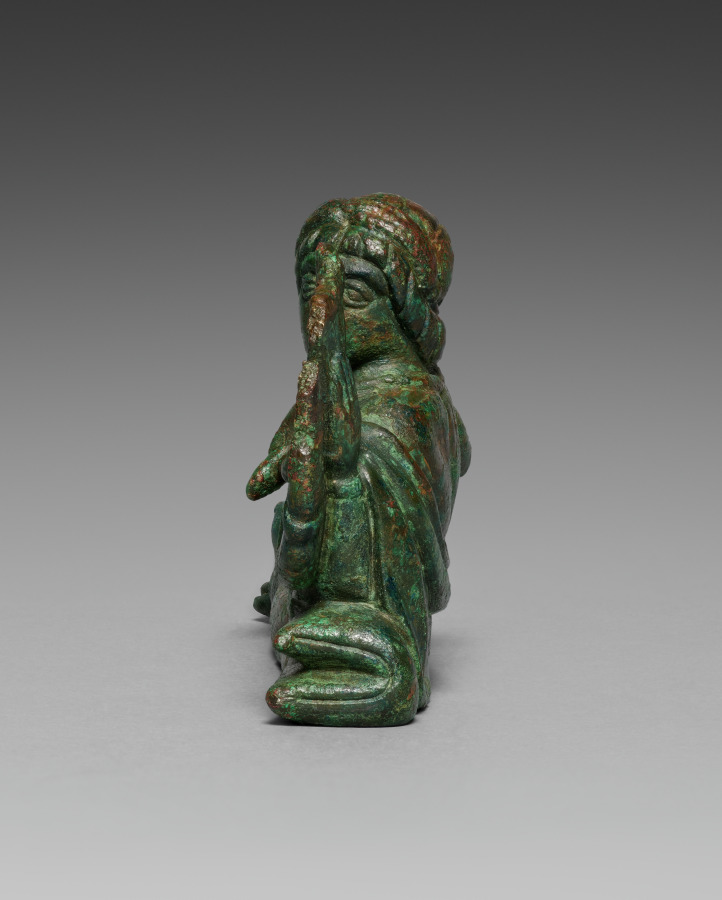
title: Vessel Ornament of Reclining Lyre-player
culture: Etruscan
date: probably 400–375 BCE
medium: bronze with gilding traces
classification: Sculpture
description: This bronze banqueter figurine was one of six once adorning the rim of a large basin, now lost. Cast in molds with individualized details, most have grooves on their underside to attach to the basin. Minute traces of gilding remain on areas of clothing and skin (mostly visible only under magnification), suggesting that they may have been completely gilded. Two handles in the form of hippocampi, horses with serpentine tails, also belonged to the basin and are now displayed at the Michael C. Carlos Museum at Emory University. The basin may have been used to hold liquid for a banquet, or was perhaps funerary. This reclining banqueter holds a lyre in his left hand and an oblong pick in his right hand. His face tilts toward the lyre and garlands hang around his head and chest. Two bare feet emerge from the bottom of the himation in a position distinct from the feet of the other figurines in this group. Some gilding remains on the top edges of the lyre and on the banqueter’s lips and drapery.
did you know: The lyre held by this banqueter bears traces of gilding.